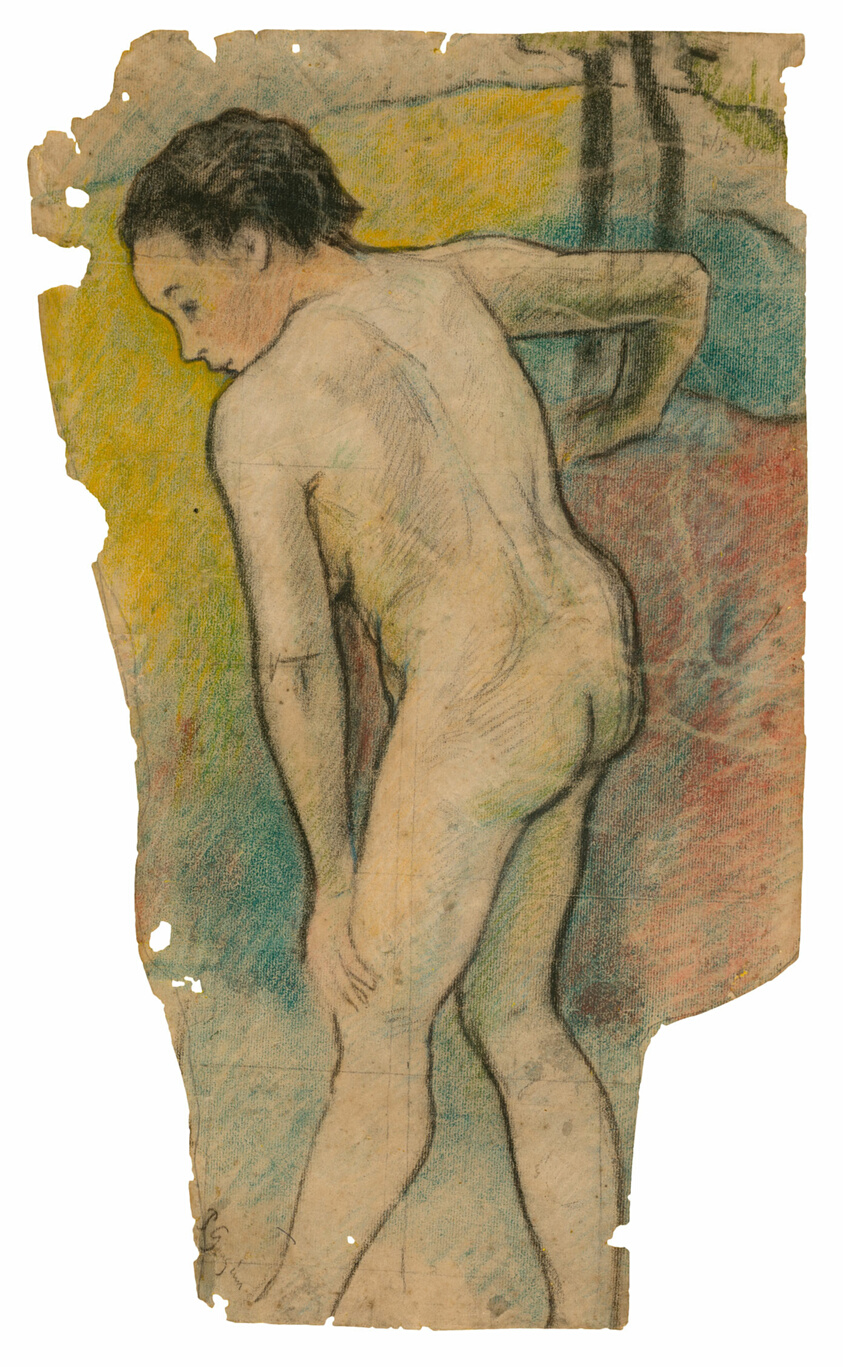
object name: Drawing and Watercolor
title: Breton Bather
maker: Paul Gauguin (French, 1848-1903)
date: 1886/87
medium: Charcoal and pastel, with touches of brush and brown ink, on ivory laid paper (discolored to tan), partially outlined in graphite and squared in black fabricated chalk, with yellow paint residue on verso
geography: France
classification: pastel; drawings (visual works); prints and drawing